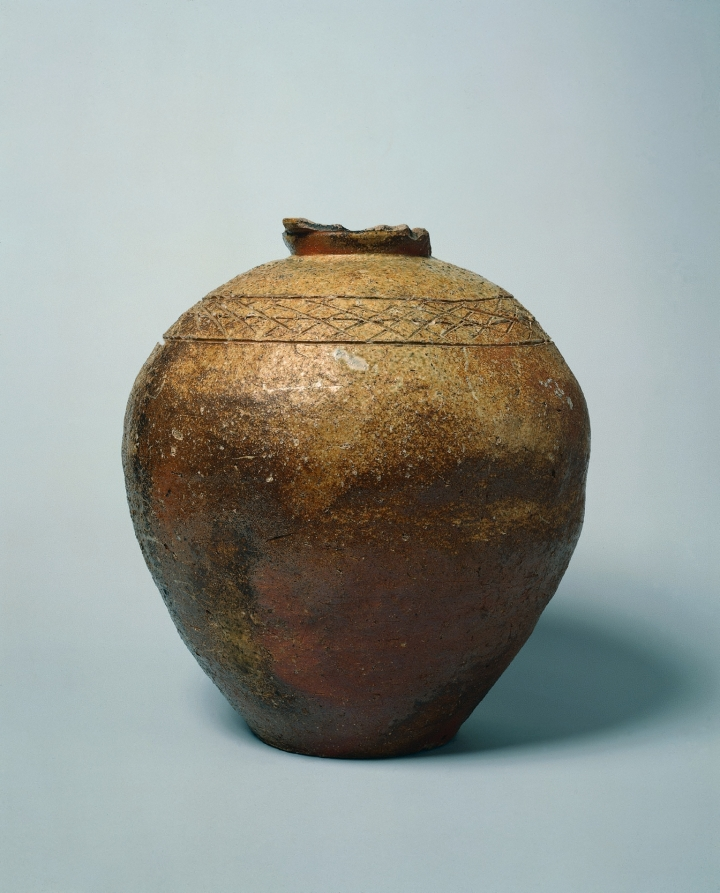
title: Storage Jar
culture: Japan, Muromachi period (1392–1573)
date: late 1300s–1400s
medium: Stoneware with natural ash glaze (Shigaraki ware)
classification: Ceramic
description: The red color of this jar comes from iron in the clay. Natural ash glaze settled on the vessel during firing. The rim would have been complete with a slightly flared lip. Around the collar is an incised pattern resembling cypress fences, a common scene in the Japanese landscape. Intended for grain storage, rustic vessels like this one were also prized by tea enthusiasts, who appreciated the uncalculated beauty of the glaze and the asymmetry of these humble vessels.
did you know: This jar was probably made using a coiling method, where coils of clay are stacked atop each other and smoothed to form its structure.